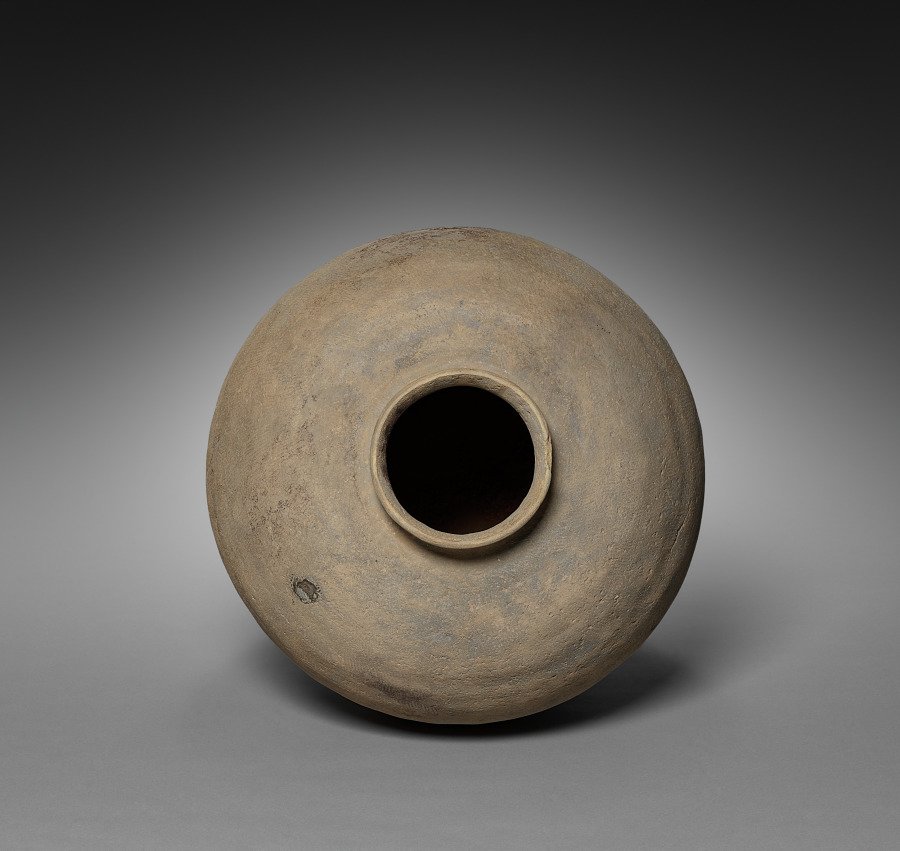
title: Burial Urn with Cover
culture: Korea, Three Kingdoms period (57 BCE–668 CE)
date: 300s–500s CE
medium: earthenware with impressed design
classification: Ceramic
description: Produced in closed kilns built on hillsides during the Three Kingdoms period, this lidded jar once contained the cremated remains of the dead. This type of burial jar became widespread after the introduction of Buddhism, as cremation became a common practice in Korea.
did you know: Closed kilns built on hillsides became widely used for producing this type of pottery vessel in Korea during the Three Kingdoms period.